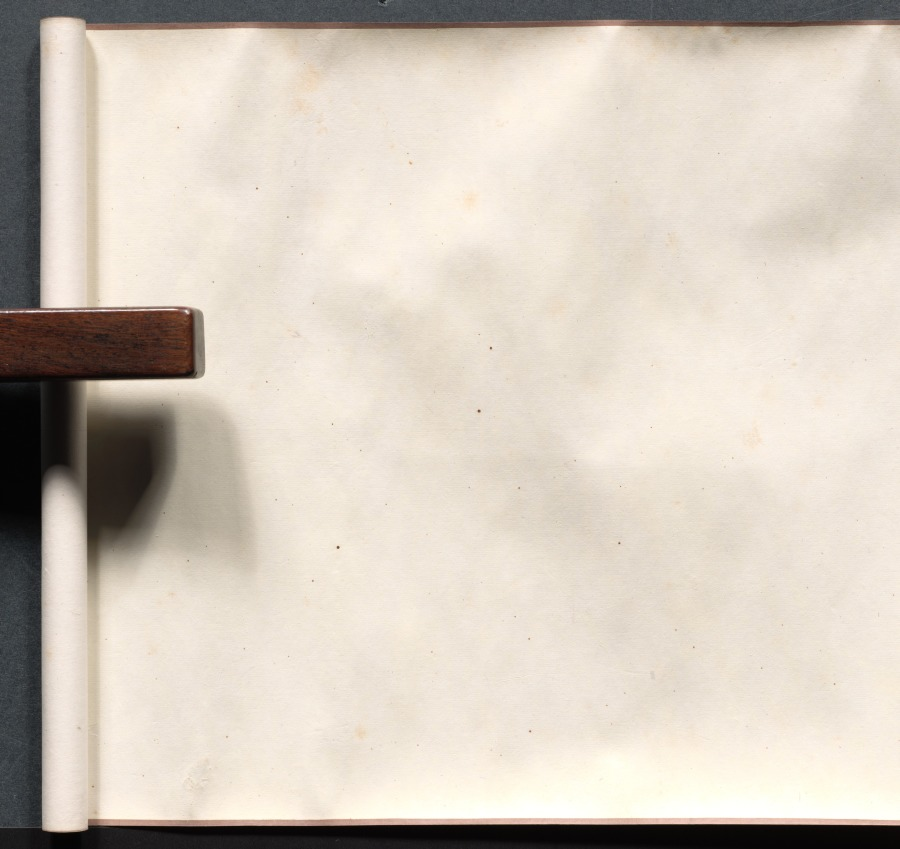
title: Four Poems: Calligraphy in Cursive Script (xingshu)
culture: China, Ming dynasty (1368–1644)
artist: Chen Jiru (Chinese, 1558–1639)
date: 1500s-1600s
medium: handscroll; ink on gold speckled paper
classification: Calligraphy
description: Written in graceful calligraphy with well-composed characters, the artist communicates his thoughts and state of mind in four poems. Characters written in dark, thick strokes convey rhythm, and indicate the moment after the writer had paused to recharge his brush with ink. Chen Jiru was a native of Huating (modern Shanghai). His calligraphy style resembles that of his friend, influential calligrapher Dong Qichang (1555–1636). Unlike Dong, Chen did not pursue government service: he burned his Confucian robes, declined a summons to serve at court, and immersed himself in literature, calligraphy, and painting.